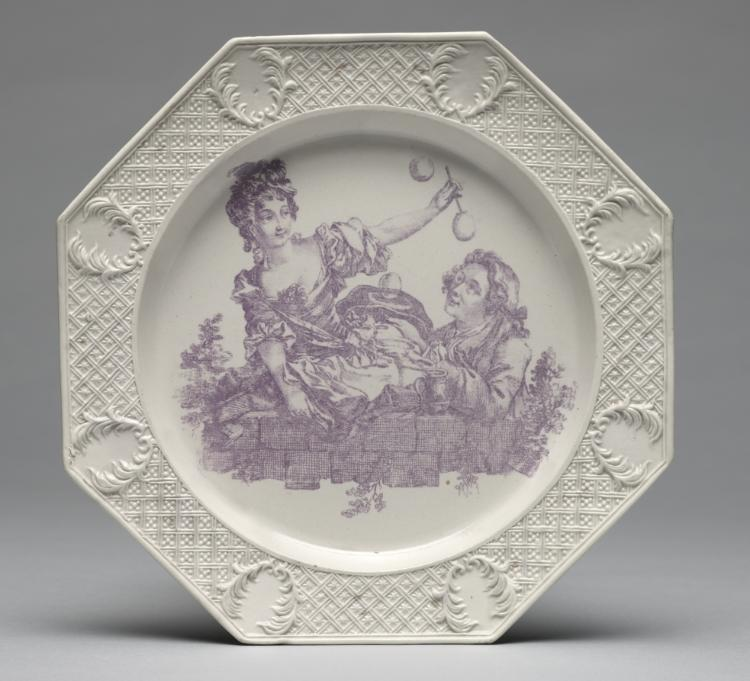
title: Plate Depicting the Soap Bubble Blower (La souffleuse de savon)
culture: England, Staffordshire, 18th century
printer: Jean Daulle (French, 1703–1763)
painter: after François Boucher (French, 1703–1770)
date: c. 1760–70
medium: salt-glazed, transfer-printed stoneware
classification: Ceramic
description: English potteries often courted aristocratic clients with cheaper wares that looked like more expensive works from the major centers of porcelain production in the eighteenth century, especially France, Germany, and China. In this case, the image printed in center of the plate depicts a young lady, enticing a boy with her skill at blowing soap bubbles through a thin pipe. The print was taken from an etching by Jean Daullé (French, 1703–1763), of the painting La souffleuse de savon (1758) by Francois Boucher (French, 1703–1770).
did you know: This plate depicts a young lady blowing soap bubbles next to a very interested young boy.